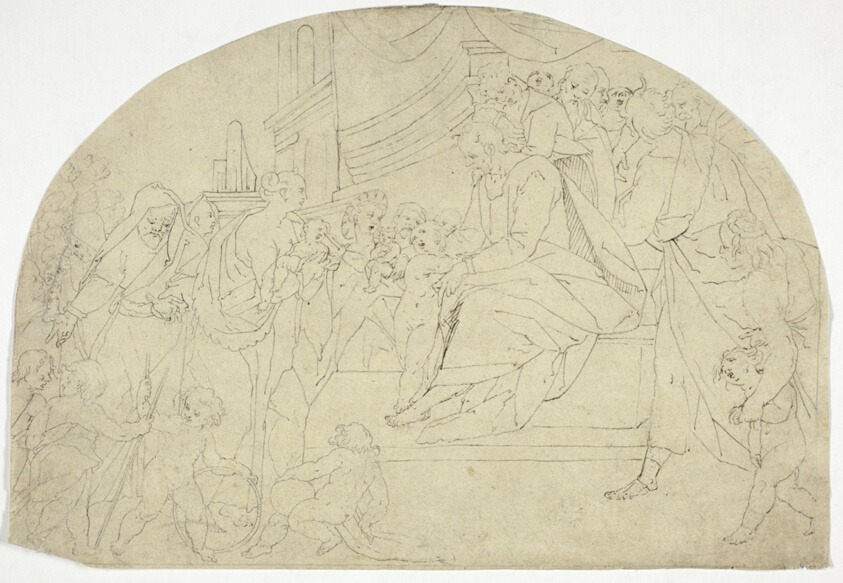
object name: Drawing and Watercolor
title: Presentation of Children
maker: Unknown Artist; possibly Italian, 19th century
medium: Pen and brown ink, over traces of graphite, on cream laid paper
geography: Italy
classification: pen and ink drawings; drawings (visual works); prints and drawing